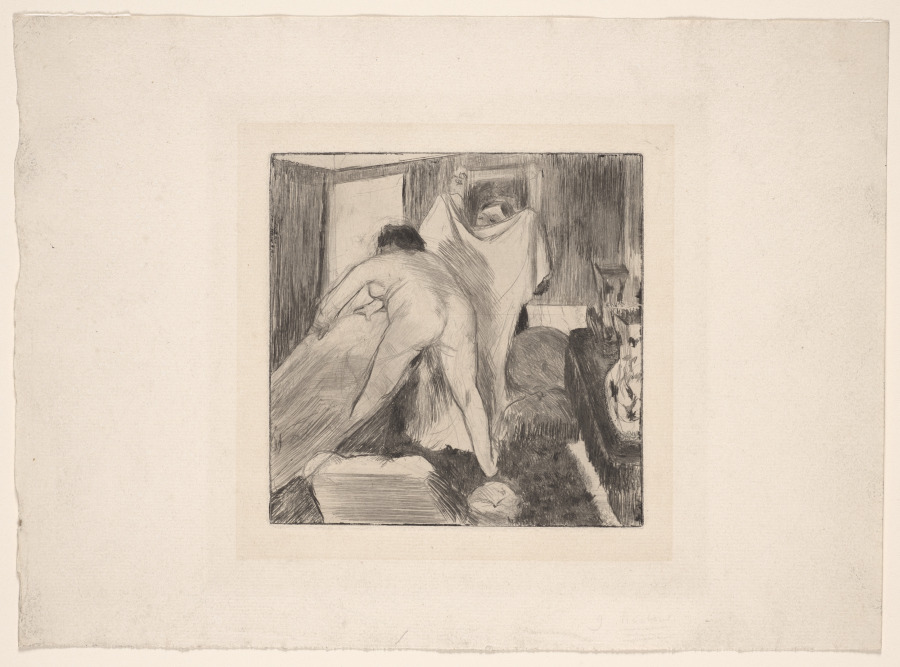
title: Leaving the Bath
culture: France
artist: Edgar Degas (French, 1834–1917)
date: 1879–80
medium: drypoint, aquatint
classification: Print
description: In Leaving the Bath, a woman is seen from behind as she awkwardly grips a tub while cautiously stepping out of it. Nearby, a maid is mostly obscured by a cloth meant to dry and warm her. Their sketchlike surroundings communicate intimacy and privacy and, in what would become a characteristic aspect of his bather imagery, Edgar Degas places the viewer in a voyeuristic perspective, with the two women unaware of our presence. The artist began to explore etching in the 1850s, registering in the print department of Paris’s Bibliothèque Nationale so that he could closely study the works of past masters such as Rembrandt van Rijn. Degas saw prints as having an important part to play in the Impressionists’ group exhibitions and displayed them alongside paintings there.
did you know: Edgar Degas created this print by drawing on a copper plate, not with a traditional etching needle, but with a copper rod—a component of early electric lamps. This nontraditional tool produced an effect that Degas appreciated, and he experimented further after bringing the plate home by working on it with materials ranging from an emery pencil to a stone.